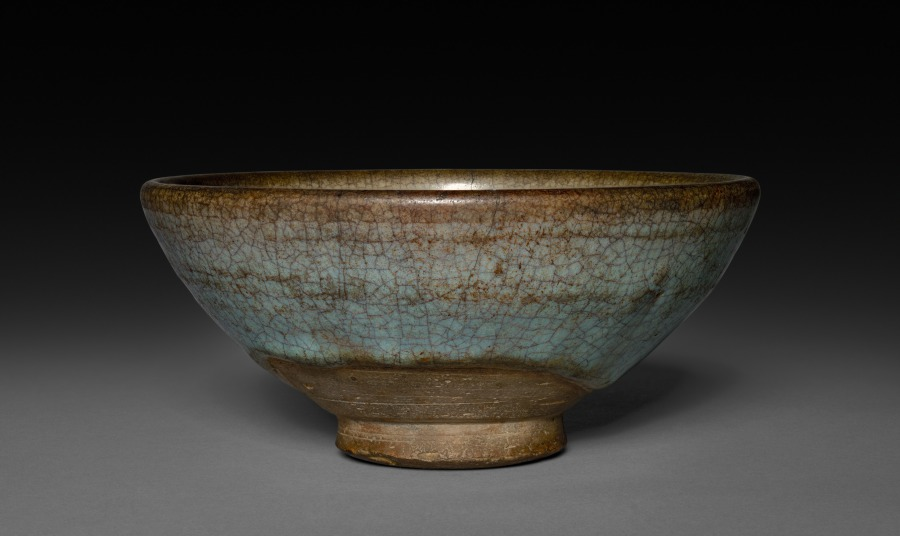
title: Bowl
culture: China, Yuan dynasty (1271-1368)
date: 1271–1368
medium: earthenware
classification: Ceramic